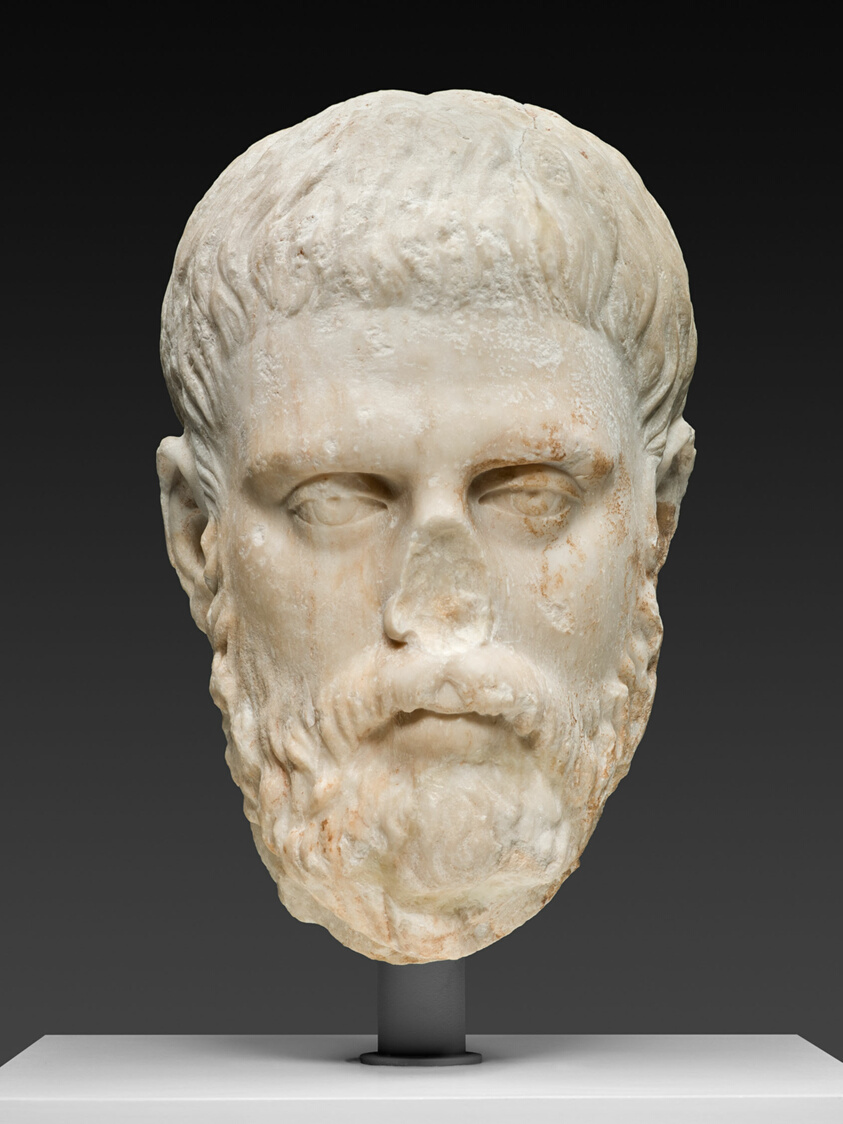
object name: Sculpture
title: Portrait Head of a Philosopher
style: roman (ancient, style or period), ancient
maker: Roman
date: Second half of the 2nd century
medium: Marble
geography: Roman Empire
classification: marble; stone; sculpture; ancient art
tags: portraits